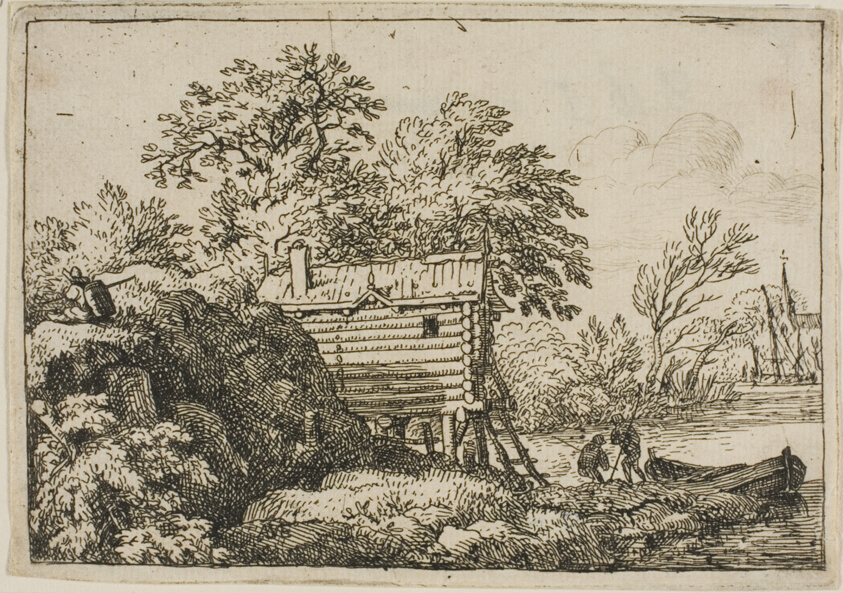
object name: Print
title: The Fisherman's Boat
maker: Allart van Everdingen; Dutch, 1621-1675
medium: Etching on ivory paper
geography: Holland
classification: etching; print; prints and drawing